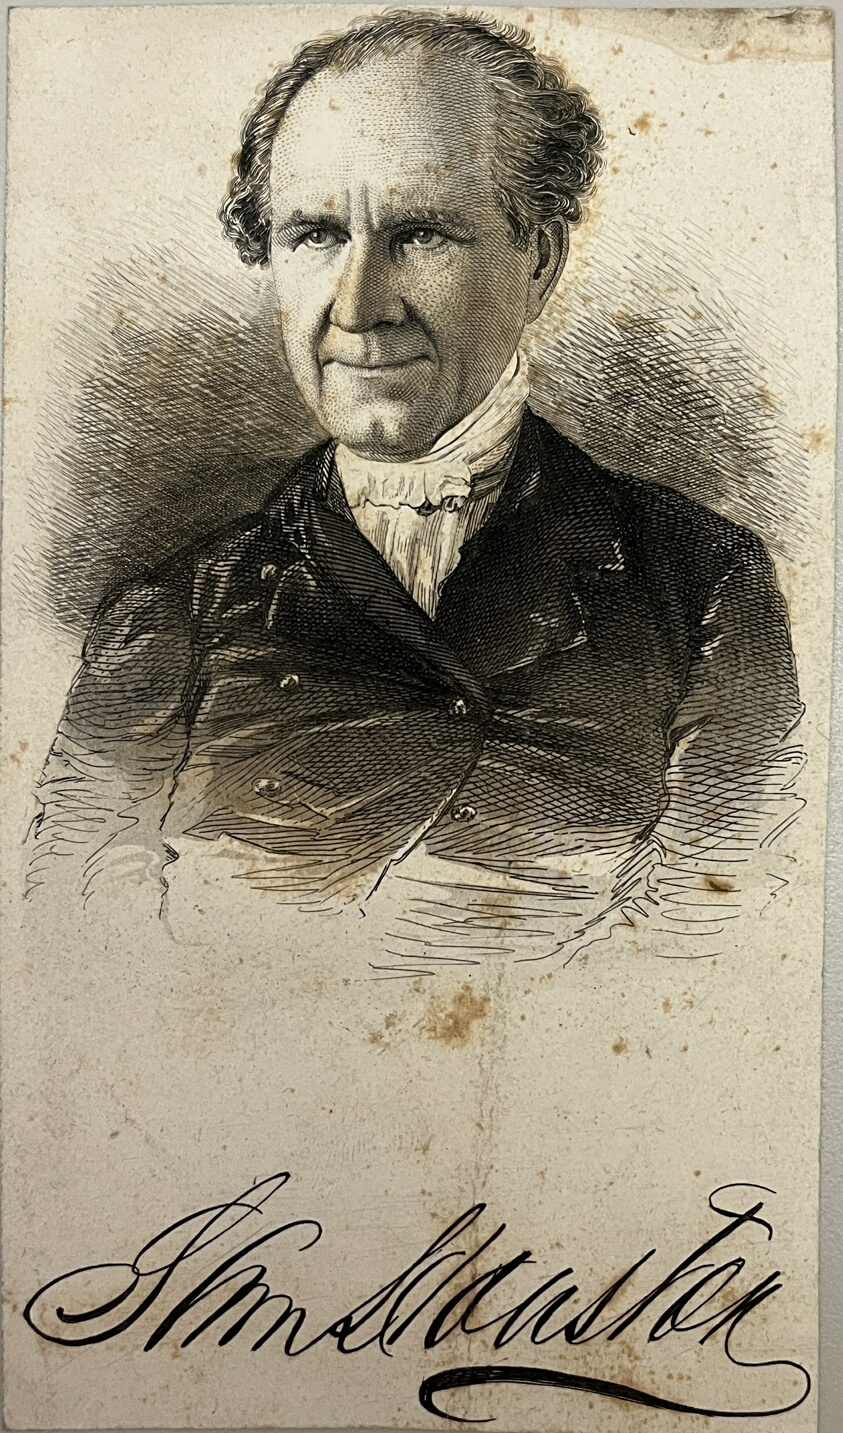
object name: Print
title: Samuel Stanston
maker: Artist Unknown (Likely American or British, 19th century)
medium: Etching on paper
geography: United States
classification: reproduction; print; prints and drawing